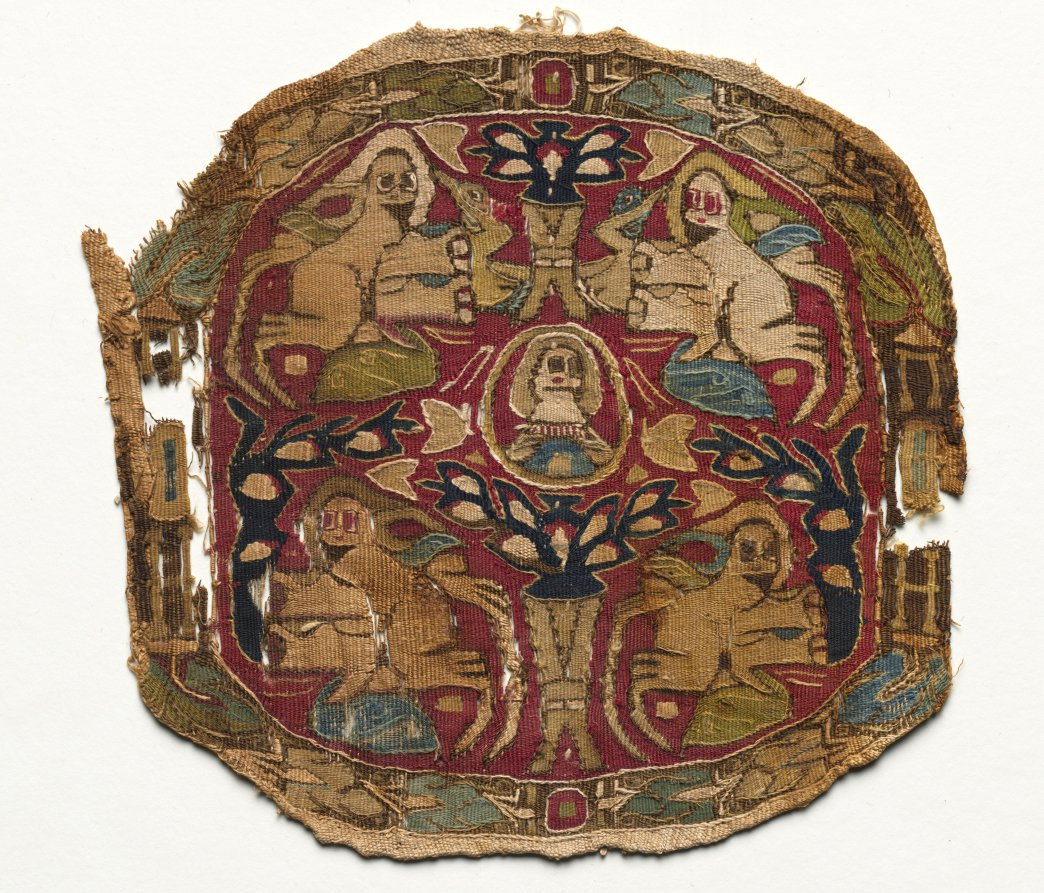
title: Segmentum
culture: Egypt, Abbasid period (?), 8th - 9th century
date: 700s - 800s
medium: tapestry; linen and wool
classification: Textile